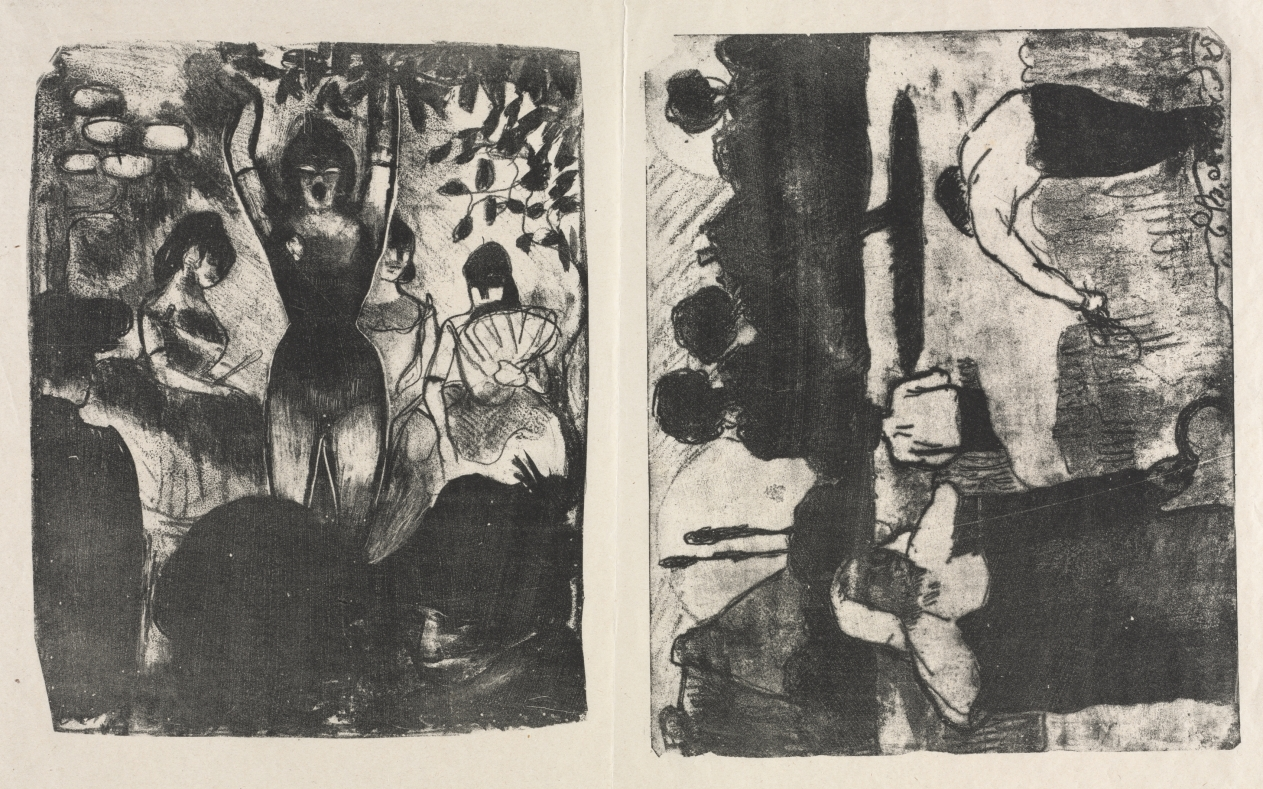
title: Singer at the Café-Concert and The Harvesters (Les Moissonneurs)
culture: France, 19th century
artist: Émile Bernard (French, 1868–1941)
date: 1888, printed 1896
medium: lithograph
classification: Print